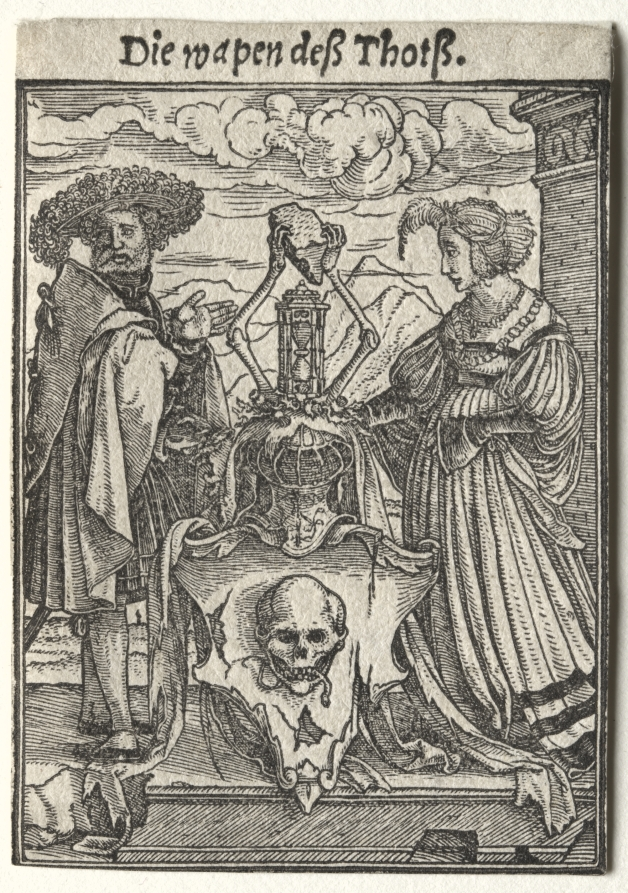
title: Dance of Death: The Coat of Arms of Death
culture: Germany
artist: Hans Holbein the Younger (German, active England and Switzerland, 1497/98–1543)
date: c. 1526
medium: woodcut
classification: Print